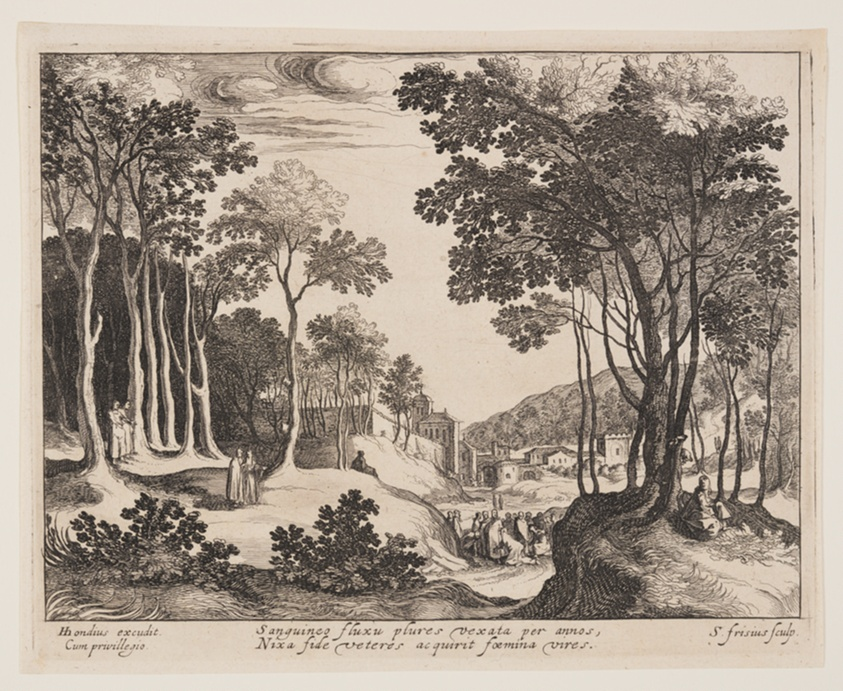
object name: Print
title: Christ Healing the Bloody Woman, from Landscapes with Scenes from the Life of Christ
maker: Simon Frisius (Dutch, c. 1580–1629)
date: c. 1600-1620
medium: Etching on ivory laid paper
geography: Netherlands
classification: etching; paper; print; prints and drawing